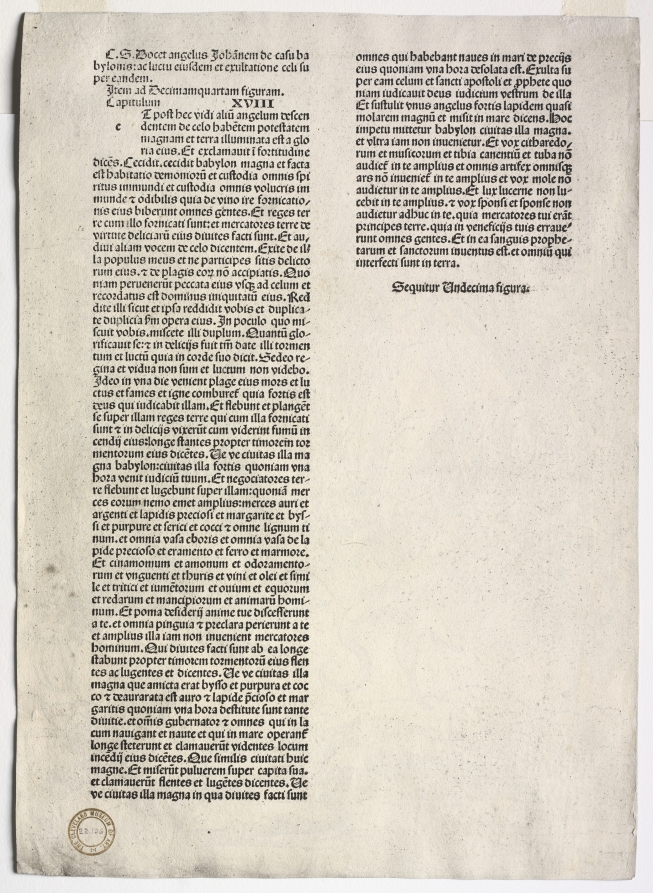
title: Revelation of St. John: St. Michael fighting the Dragon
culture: Germany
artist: Albrecht Dürer (German, 1471–1528)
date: 1511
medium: woodcut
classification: Print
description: This woodcut comes from a series of 15 scenes from the Apocalypse. Dürer drew upon late northern Gothic traditions infused with the reality of spiritual events, biblical interpretation, and dense composition, as well as careful attention to naturalistic details of flora and fauna. He interprets Saint John’s visions by giving them a convincing physical existence. This scene depicts the war in heaven, a final battle between good and evil. Saint Michael and his angels defeat the dragon (Satan) and the other fallen angels, now morphed into repulsive demons, casting them into hell.